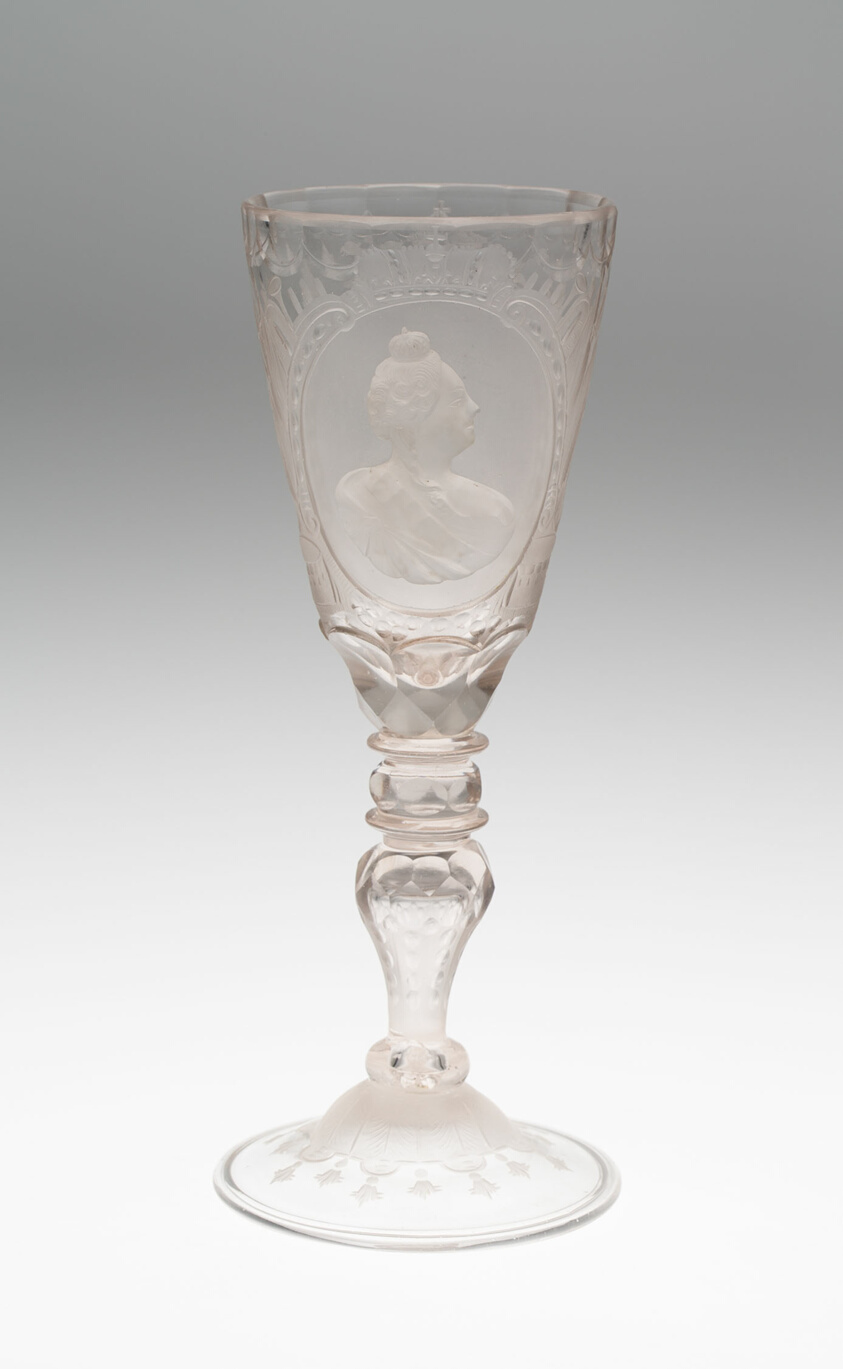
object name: Glass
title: Goblet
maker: Germany, Saxony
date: Mid 18th century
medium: Glass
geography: Saxony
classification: drinking vessel; glass; european decorative arts